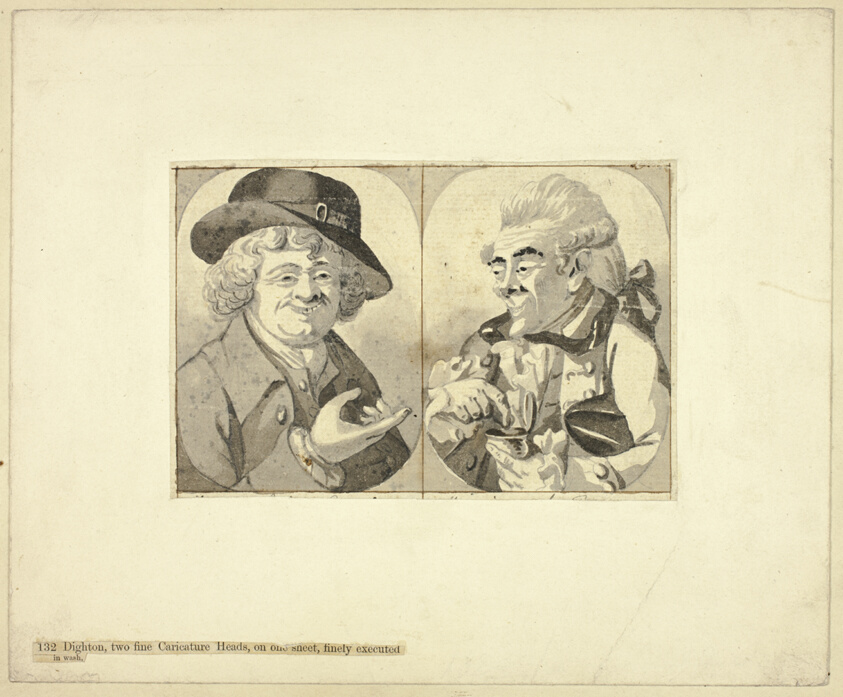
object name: Drawing and Watercolor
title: Two Bust-length Caricatures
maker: Attributed to Robert Dighton; English, c. 1752-1814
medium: Brush and gray ink and gray wash, over traces of graphite, on ivory laid paper, laid down on cream wove paper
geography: England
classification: ink or chalk wash; drawings (visual works); prints and drawing